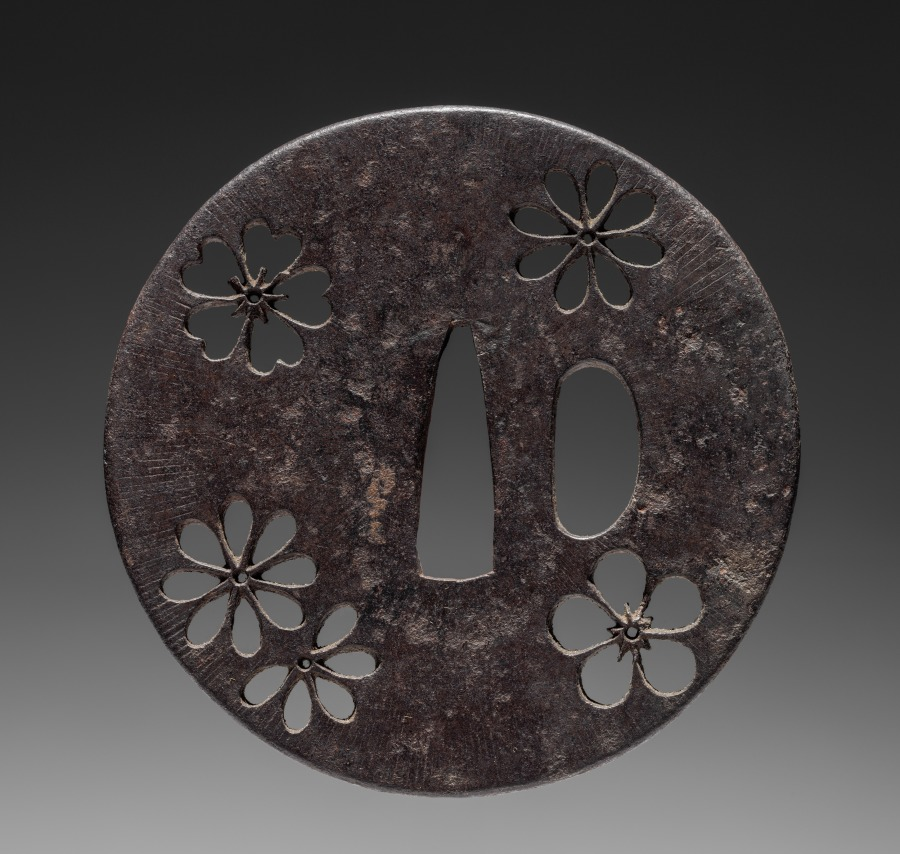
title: Sword Guard (Tsuba)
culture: Japan, possibly Edo period (1615-1868)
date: c. 1615–1868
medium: iron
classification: Arms and Armor